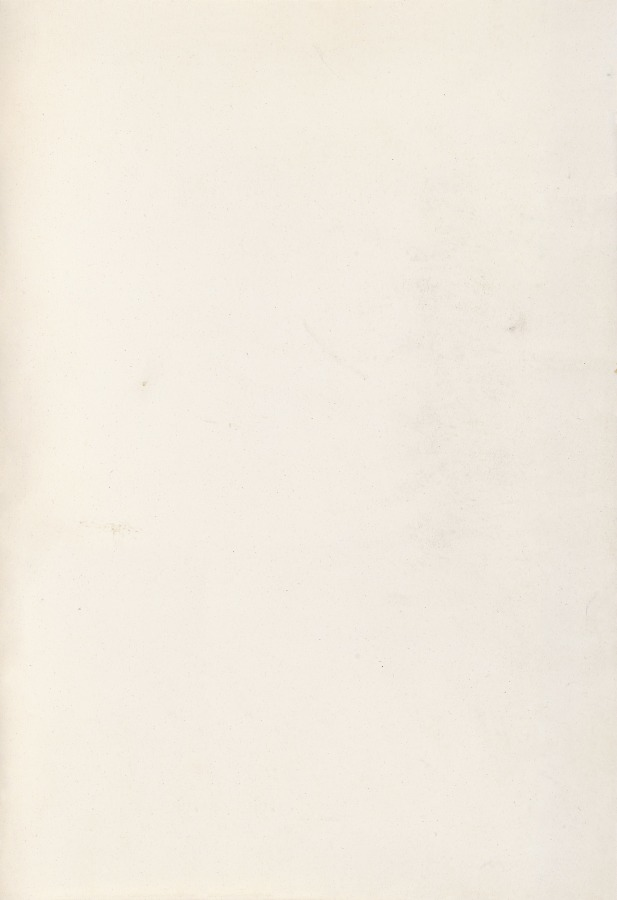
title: Hours of Queen Isabella the Catholic, Queen of Spain: Fol. 280v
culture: Flanders, Ghent and Bruges, late 15th century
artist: Master of the First Prayerbook of Maximillian (Flemish, c. 1444–1519)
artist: and Associates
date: c. 1500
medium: ink, tempera, and gold on vellum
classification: Bound Volume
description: This manuscript was illuminated by a circle of at least five highly organized manuscript painters active in the Flemish cities of Ghent and Bruges. The principal illuminator was Alexander Bening, who painted the majority of the book's miniatures. Manuscripts produced by this circle of artists are renowned for the decoration of their borders, which typically feature a rich variety of realistically-painted flowers, birds, and butterflies. This prayer book, called a book of hours, was intended not for a cleric, but for the private devotions of a lay person-in this case, Isabella the Catholic, Queen of Spain (1451-1504). Isabella's coat of arms embellishes the book's frontispiece. It is unlikely that the book was commissioned by the Queen herself; rather, she probably received it as a diplomatic gift from someone courting her patronage, perhaps Cardinal Francisco Jimenez de Cisneros. A Franciscan friar, Jimenez was dependent upon Isabella for his advancement, first to the post of Queen's confessor in 1492, and then to Archbishop of Toledo in 1495.